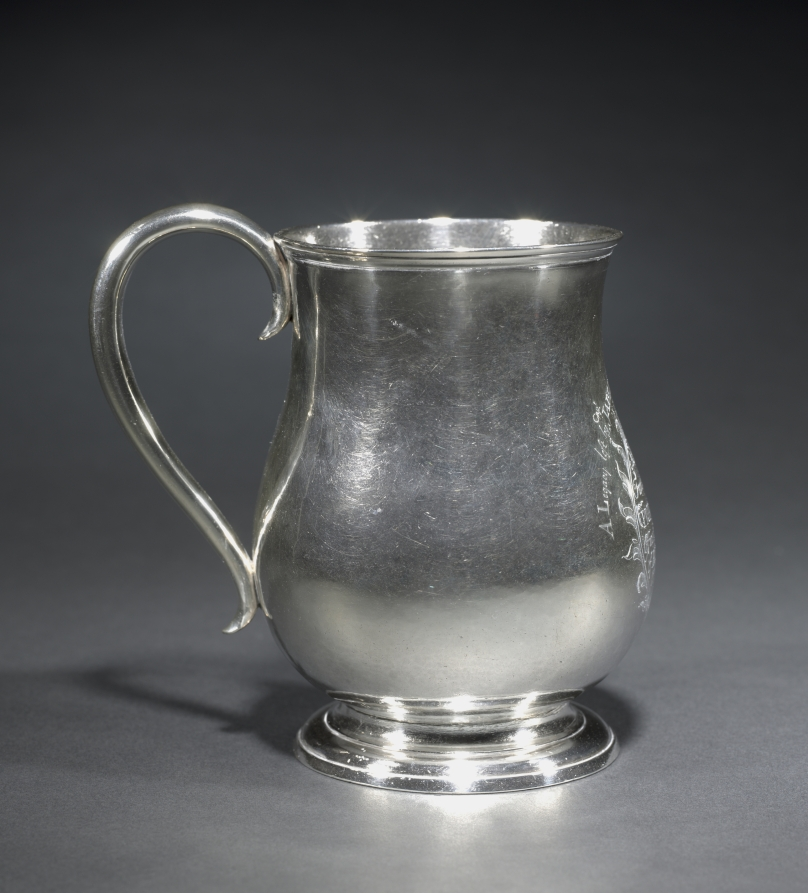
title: Cann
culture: America, Massachusetts, Boston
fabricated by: Jacob Hurd (American, 1702–1758)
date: 1747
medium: silver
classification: Silver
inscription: engraved within reserve on front, opposite handle: "A GIFT/From some of The/PRINCIPALL/ Officers in the regiment/of BOSTON to/Mr Adjutant/HUNT/1747." Above the reserve: "A Legacy left by Capt JABEZ HUNT to John Leverett Junr 1763."